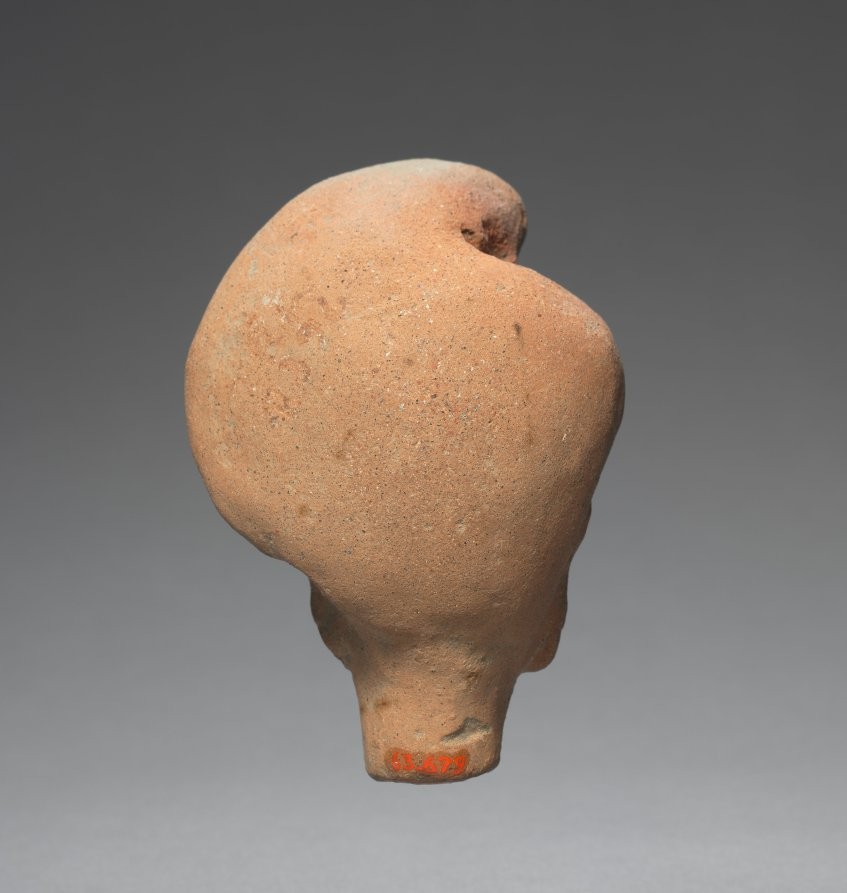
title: Head of a Woman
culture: Java, Majapahit period (1294–1478)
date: 1300s–1400s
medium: terracotta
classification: Sculpture